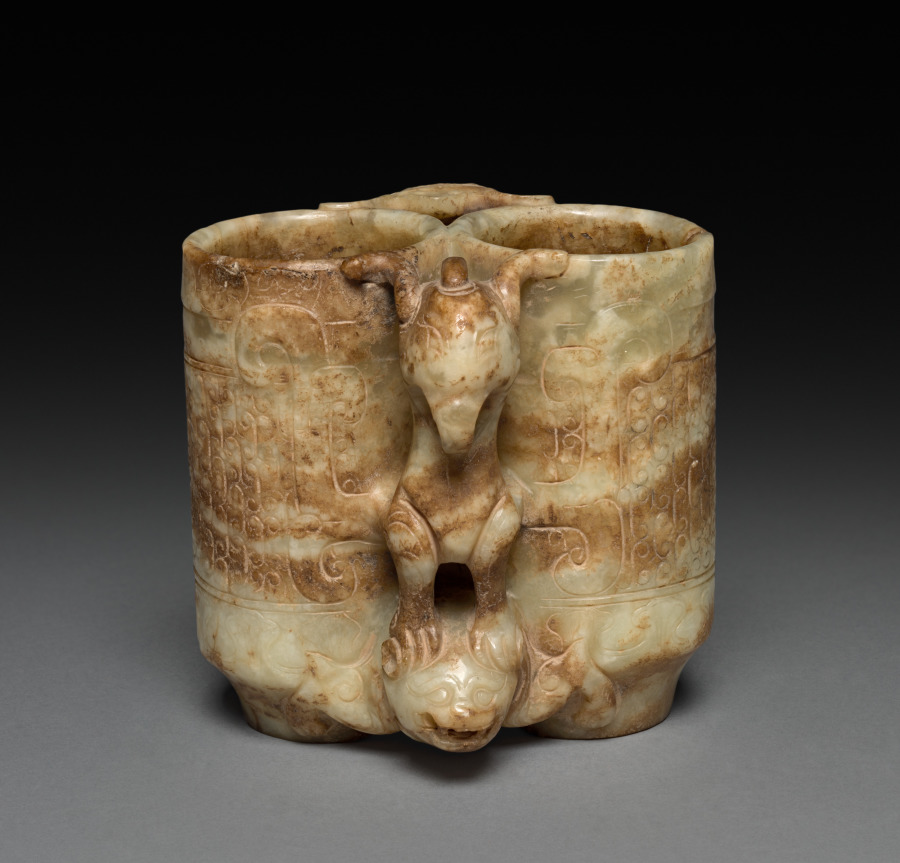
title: Champion Vase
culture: China, Song dynasty (960-1279) - Ming dynasty (1368-1644)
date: 960– 1279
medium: jade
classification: Jade